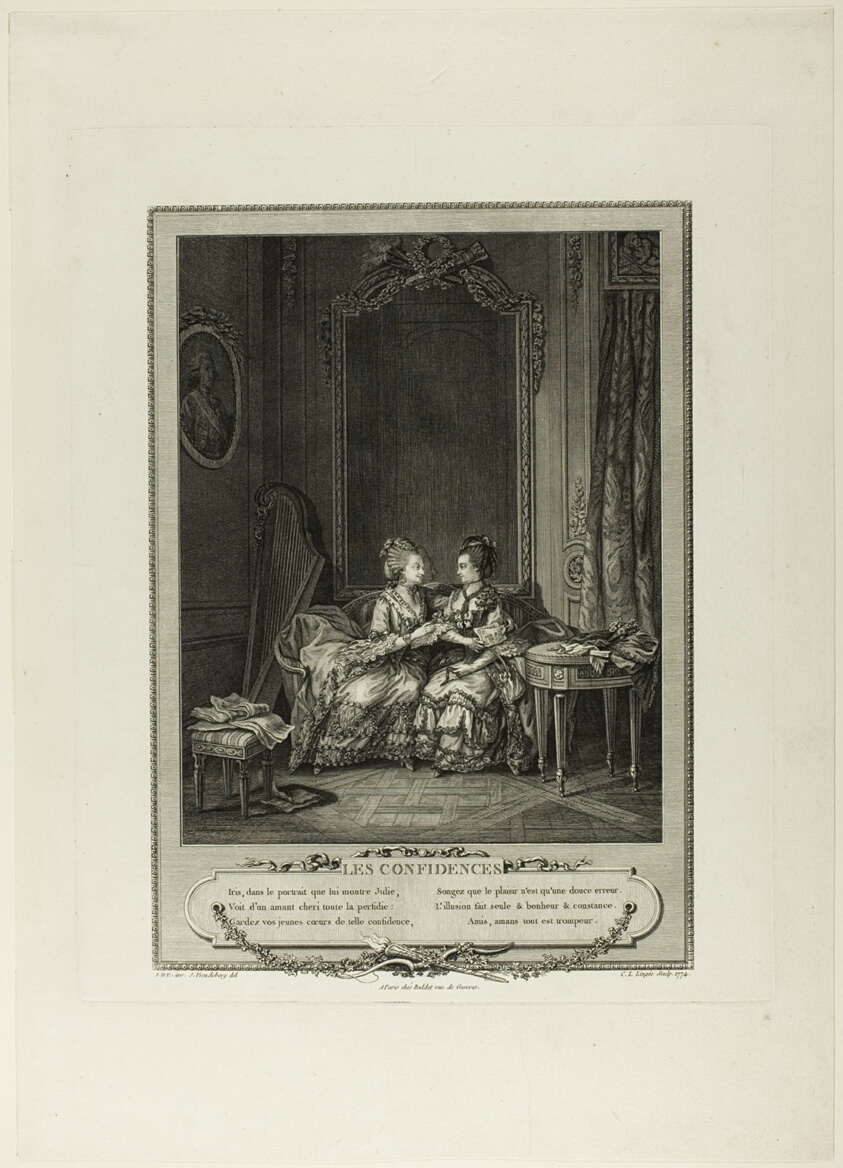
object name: Print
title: Confidences, from Monument du Costume Physique et Moral de la fin du Dix-huitième siècle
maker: Charles Louis Lingée (French, 1748-1819); after Sigmund Freudeberg (Swiss, 1745-1801) and Jean Henri Eberts (Swiss, 18th century); published by Laurent-François Prault (French 1712-1780)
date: 1774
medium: Engraving on paper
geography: France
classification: etching; print; prints and drawing